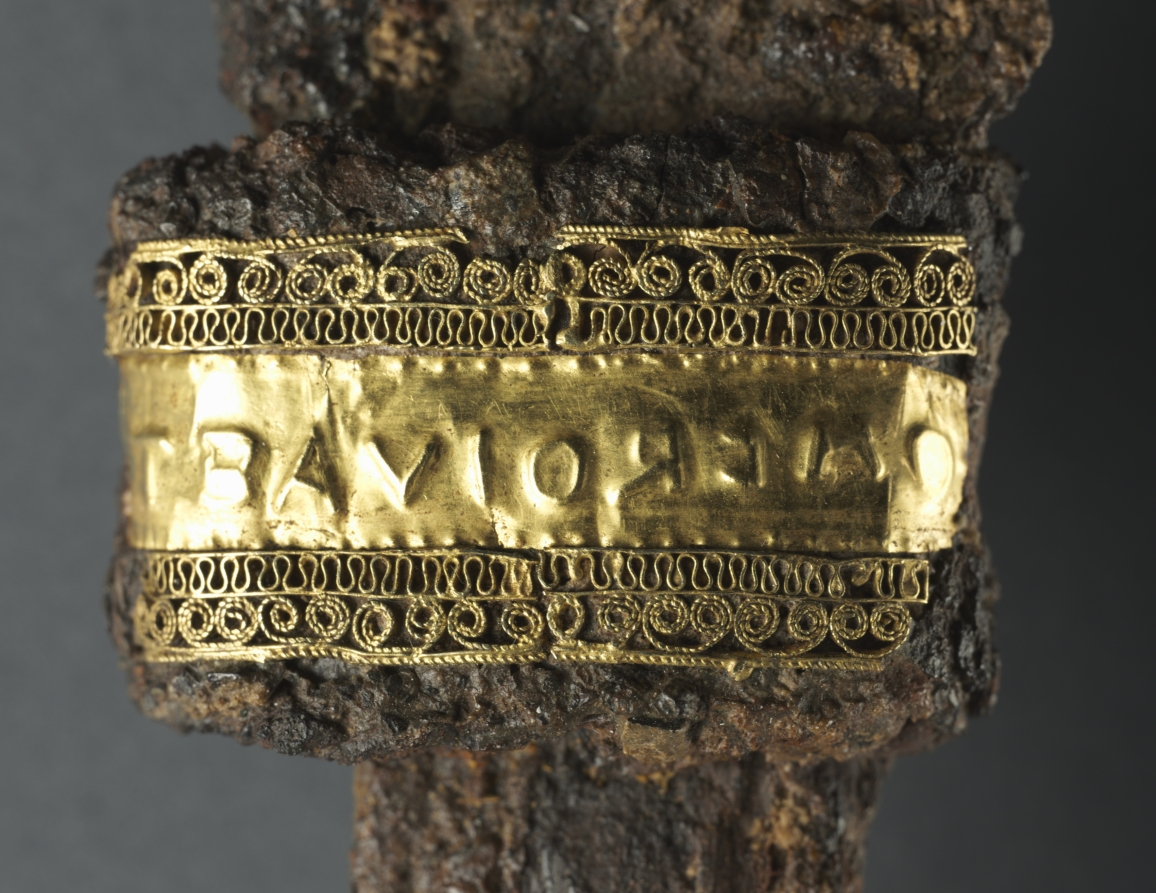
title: Single-Edged Knife (Scramasax)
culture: Frankish, Champagne(?), Migration period, 7th century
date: 600s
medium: iron, copper, and gold foil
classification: Arms and Armor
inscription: guard decorated with two bands of gold filigree between which is a thin band of plain gold with an embossed inscription.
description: The scramasax, a single-edged knife, was a general purpose implement. It could serve equally well as a tool or as a weapon and generally did not exceed 12 inches in length. As with most objects of the Migration period, iron weapons survive as excavated grave goods and tend to be heavily corroded. The grips, now missing, were probably fashioned from wood or bone and silver inlay decorated the pommels (the knob on the hilt, or handle). The ornamental gold foil bands, perhaps from the original scabbards (the cases in which the blades of swords or daggers are kept) have survived relatively intact.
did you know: Known as a scramasax, seax means knife in Old English.